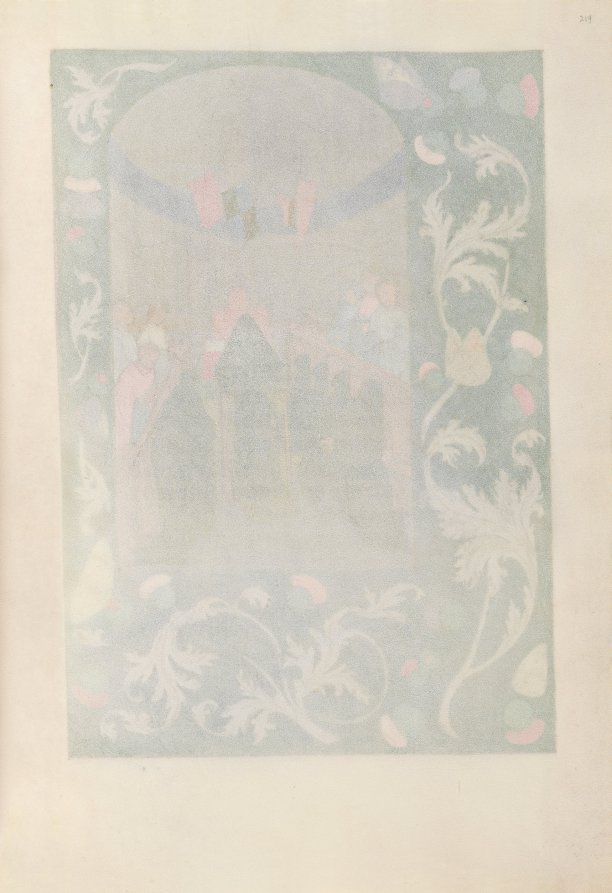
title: Hours of Queen Isabella the Catholic, Queen of Spain: Fol. 219r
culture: Flanders, Ghent and Bruges, late 15th century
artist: Master of the First Prayerbook of Maximillian (Flemish, c. 1444–1519)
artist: and Associates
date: c. 1500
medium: ink, tempera, and gold on vellum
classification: Bound Volume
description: This manuscript was illuminated by a circle of at least five highly organized manuscript painters active in the Flemish cities of Ghent and Bruges. The principal illuminator was Alexander Bening, who painted the majority of the book's miniatures. Manuscripts produced by this circle of artists are renowned for the decoration of their borders, which typically feature a rich variety of realistically-painted flowers, birds, and butterflies. This prayer book, called a book of hours, was intended not for a cleric, but for the private devotions of a lay person-in this case, Isabella the Catholic, Queen of Spain (1451-1504). Isabella's coat of arms embellishes the book's frontispiece. It is unlikely that the book was commissioned by the Queen herself; rather, she probably received it as a diplomatic gift from someone courting her patronage, perhaps Cardinal Francisco Jimenez de Cisneros. A Franciscan friar, Jimenez was dependent upon Isabella for his advancement, first to the post of Queen's confessor in 1492, and then to Archbishop of Toledo in 1495.